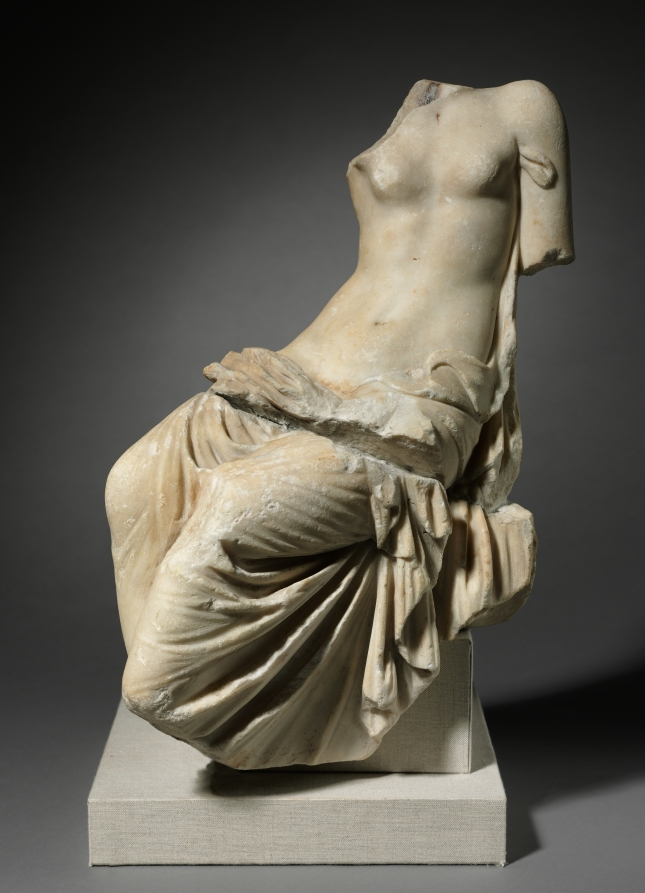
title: Seated Figure of a Woman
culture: Italy, Roman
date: 1–200 CE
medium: marble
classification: Sculpture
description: Although the original subject of this ancient Roman statue fragment is unknown, the cut stone at the back of its base indicates that the statue rested on a ledge, probably incorporated into a larger sculptural group. The nude upper body and relaxed pose suggest an alluring mythical woman, like Venus or a nymph, a beautiful female spirit that embodies elements of nature such as water, woods, or mountains.